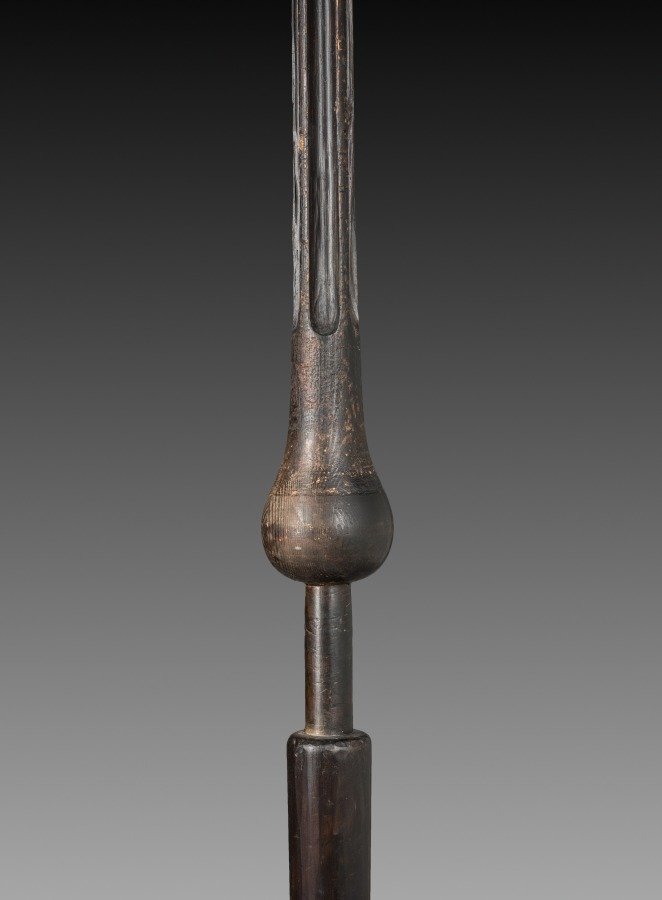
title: Tourney Lance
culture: unassigned (European), probably late 19th century (in 16th century style)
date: probably late 1800s (in 16th century style)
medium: wood, five concave sections, painted red and white; steel point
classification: Arms and Armor